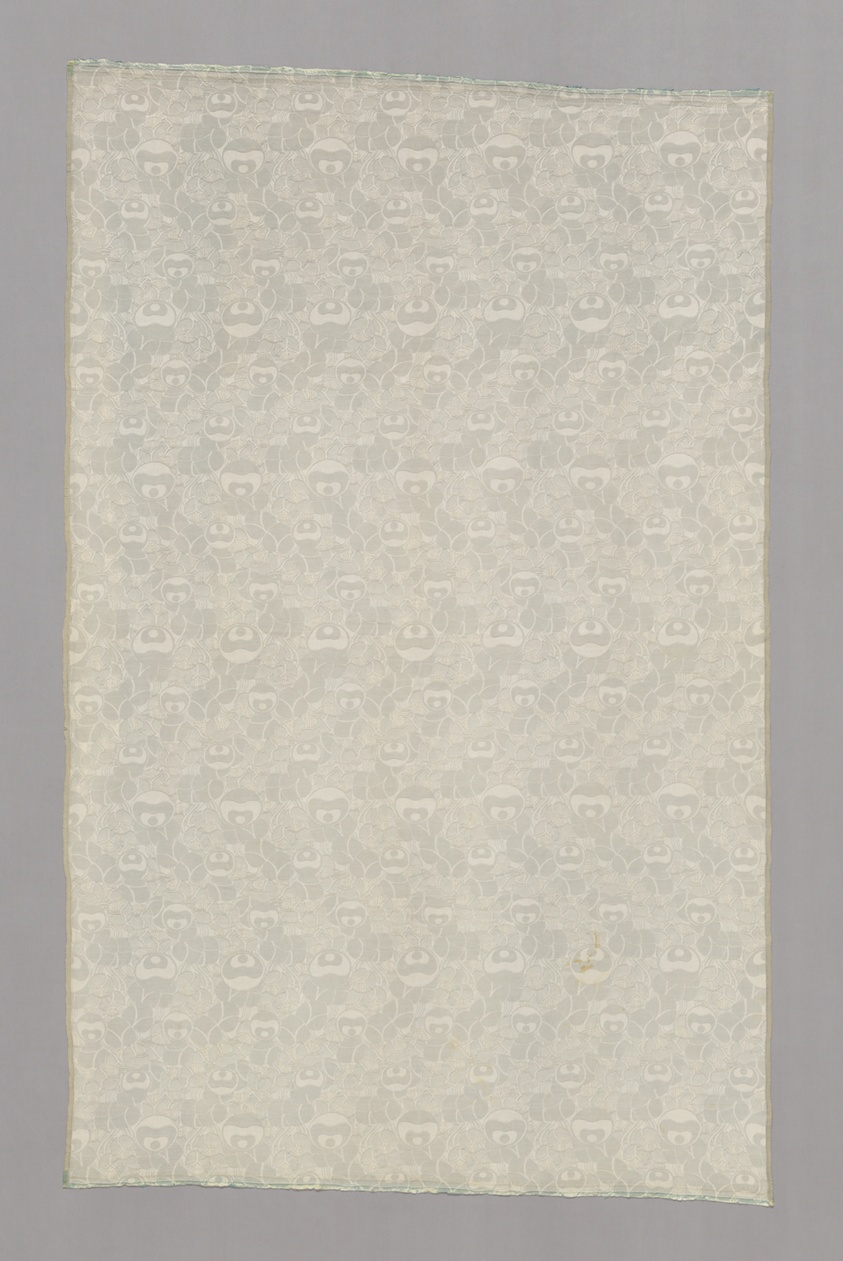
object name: Textile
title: Hafis (Dress or Furnishing Fabric)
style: Modernism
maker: Designed by Koloman Moser (Austrian, 1868–1918); Produced by Johann Backhausen & Söhne (Austrian, 1849-2012); Austria, Vienna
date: 1899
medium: Cotton, satin weave self-patterned by areas of twill and plain weaves; woven on loom with Jacquard attachment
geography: Vienna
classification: textile; weaving; furnishing textile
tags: floral, flowers, vines